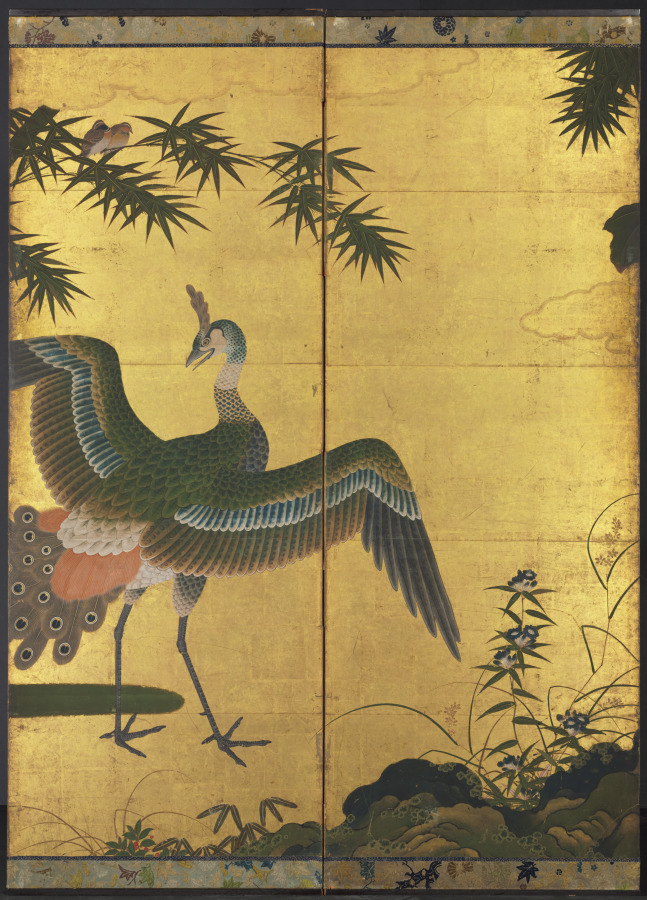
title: Peacocks and Bamboo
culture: Japan, Momoyama period (1573–1615)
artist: attributed to Tosa Mitsuyoshi (Japanese, 1539–1613)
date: late 1500s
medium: One of a pair of six-panel screens; ink, color, and gold on gilded paper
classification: Painting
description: The immense heraldic birds on display in these byøbu reflect the Momoyama era's spirit of newly gained self-confidence and an affinity for grand expressive statements in painting, architecture, the textile and ceramic arts, as well as garden design. While that period preceded the arrival of prosperity, it clearly marked an extra---ordinary moment in Japanese cultural history, one frequently compared with the twelfth century of the Heian period. Through the extensive use of gold-foil backgrounds rather than the somber palette of carefully orchestrated ink tones evident in Muromachi byøbu, patrons colla-borated with artists as well as craftsmen in fostering a decidedly new look in much of Japanese painting. Here for instance there is no imaginary vista suggesting China's vast waterways and mountain ranges. The setting is composed instead of highly stylized lozenges of mineral green paint, suggesting the earth from which clumps of grass, flowering plants, and towering bamboo and paulownia trees emerge. Clusters of lumpy, blue-green rocks dotted with lichen provide stabilizing three-dimensional foils for these islands of vegetation as well as the all-encompassing flat, golden surface. The glorious artificiality of the setting precisely serves the artist's effort to compose a credible yet other-worldly vista for depicting the legendary phoenix gazing across the landscape at the pair of peacocks. Rather than an emblem of immortality, as it is in Western lore, in Japan the phoenix evolved out of its origins in Chinese mythology to become, by the sixteenth century, an auspicious symbol of political authority. Together with clusters of the distinctively shaped paulownia leaves, this long-tailed, mythical bird graced lacquerware as well as mural paintings, proclaiming an air of graceful com-mand. A characteristic infusion of temporality has been included also, through a seasonal flowering schema extending from spring to early summer (right) to fall and the advent of winter (left). Although traditionally attributed to the Tosa school master Tosa Mitsuyoshi (1539-1613), these byøbu possess neither seals nor signatures to confirm that authorship. Known for his jewel-like, modest-sized album paintings of courtly narratives such as The Tale of Genji, it is likely both studio training and contemporary fashions in patronage conspired to produce a good number of such byøbu. This example from the Momoyama era represents one such effort from a masterful Tosa painter, too little seen in Western collections.